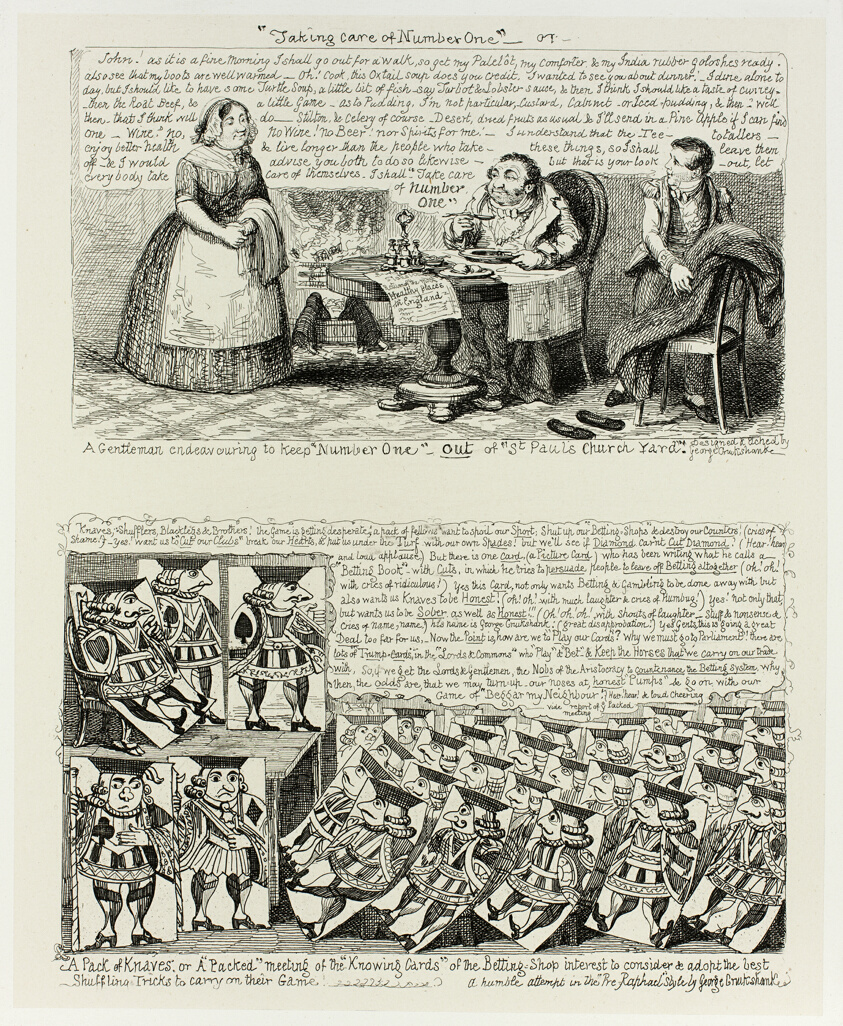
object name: Print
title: "Taking Care of Number One" or A Gentleman Endeavoring to Keep "Number One" Out of "St Pauls Church Yard" from George Cruikshank's Steel Etchings to The Comic Almanacks: 1835-1853 (top)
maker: George Cruikshank (English, 1792-1878); published by Pickering & Chatto (English, 19th century)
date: 1853, printed c. 1880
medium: Two steel etchings in black on cream India paper, laid down on off-white card (chine collé)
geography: England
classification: print; prints and drawing